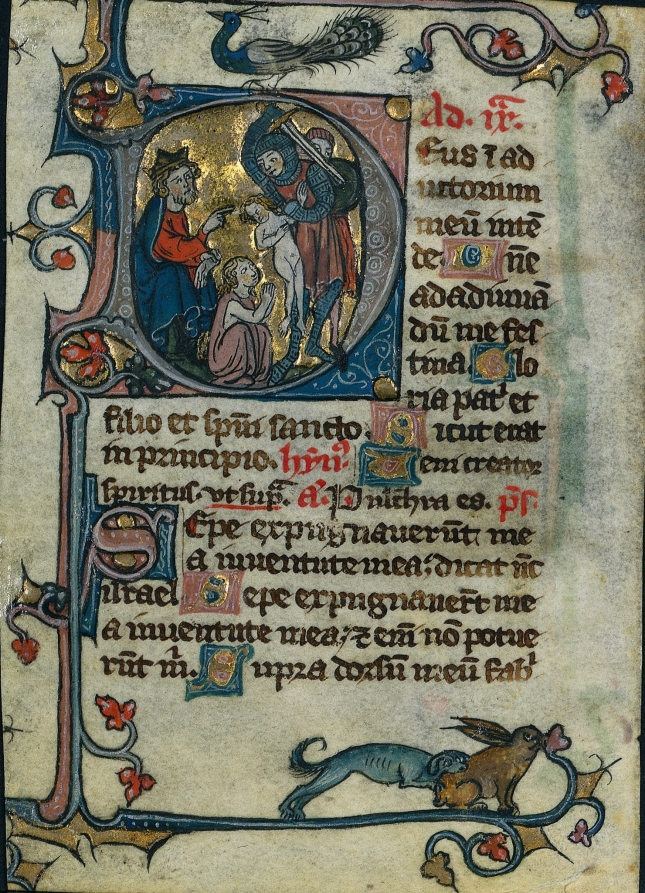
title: Leaf from a Book of Hours: Initial D: Massacre of the Innocents (1 of 2 Excised Leaves)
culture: Northeastern France or Flanders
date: c. 1300–1330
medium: ink, tempera and gold on vellum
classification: Manuscript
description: Books of Hours were Christian devotional books with texts, prayers and psalms for Christian devotion which were written primarily for laymen. They were popular in circles of the rich, educated nobility. Just like this leaf, which was probably made in France at the beginning of the 14th century, the pages of the Books of Hours often show elaborate decoration to invite the reader to take a closer look. After the great plague, individual piety flourished and the Book of Hours also experienced its heyday, especially in France and Flanders.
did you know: This page was part of the prayers for compline or the night prayer said at the end of the day before retiring, usually around 7 p.m.